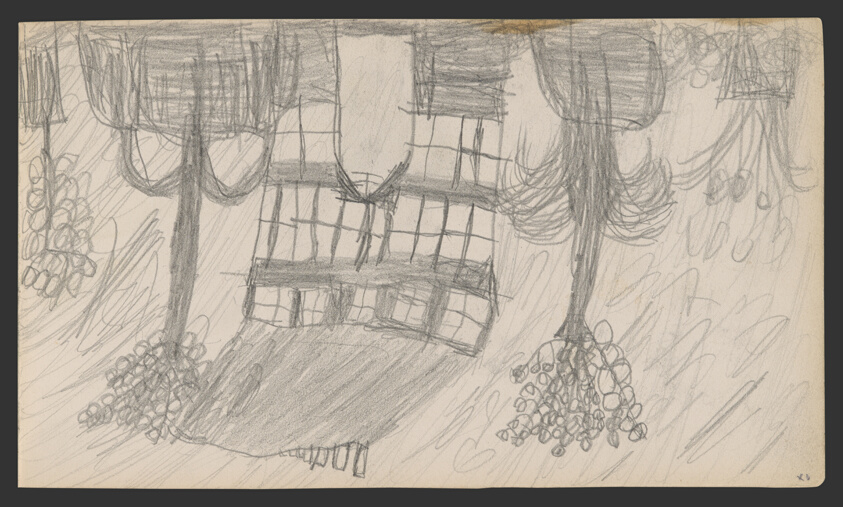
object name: Drawing and Watercolor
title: Sketchbook No. 2 (L'Estaque)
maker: Paul Cézanne; French, 1839-1906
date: 1875–86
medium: Graphite and pen and ink drawings on paper, bound into a book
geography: France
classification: sketchbook; graphite; prints and drawing; paper